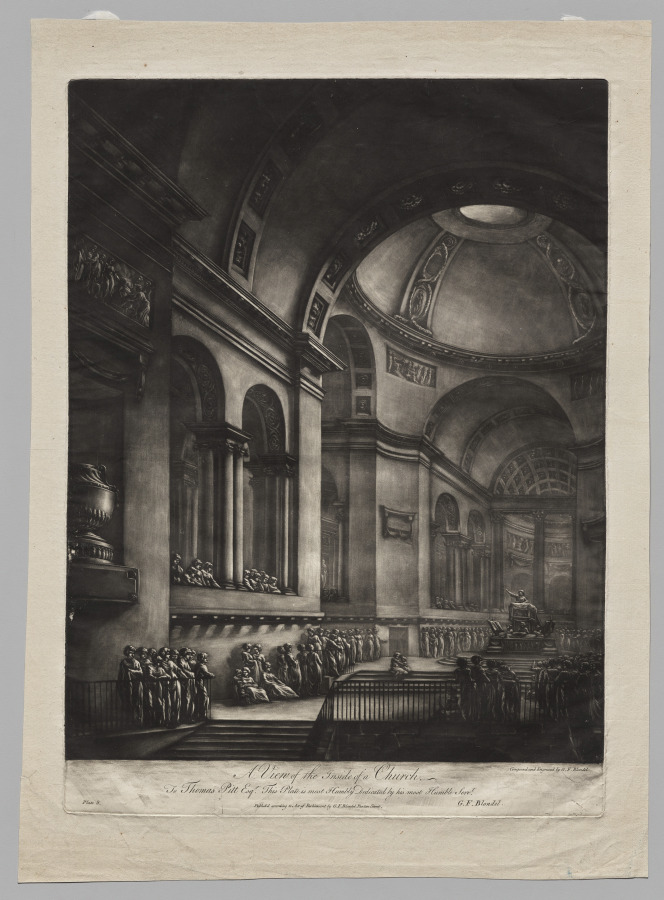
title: A View of the Inside of a Church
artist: Georges Francois Blondel (French, 1730–1800)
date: 1766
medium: mezzotint printed in black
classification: Print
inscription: Imprinted on recto: “A View of the Inside of a Church”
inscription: Imprinted on recto: “Composed and Engraved by G.F. Blondel.”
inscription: Imprinted on recto: “To Thomas Pitt Esq. This Plate is most Humbly Dedicated by his most Humble Serv’t/Published according to Act of Parliament by G.F. Blondel Panton Street./G.F. Blondel/Plate 8”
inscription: Watermark: Grand-Jésus stock of T. Dupuy, watermark Name of Jesus (IHS), countermark T Dupuy Fin Auvergne 1742.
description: After returning from several years spent in Italy, the French printmaker George-Francois Blondel settled in London in order to take advantage of the English taste for images of Italian sites. This is one of a series of eight prints he published in 1766 depicting imagined and real Italian interiors. Using the relatively new technique of mezzotint, which creates velvety, dark tonal areas, as well as low vantage points, Blondel created towering, awe-inspiring spaces. For special patrons, he printed the plates in sepia ink, rather than in black; the CMA’s set includes two of these unusual sepia impressions.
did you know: Mezzotint was relatively new at the time this print was made and had yet to be utilized for such large plates of an architectural nature as seen here.